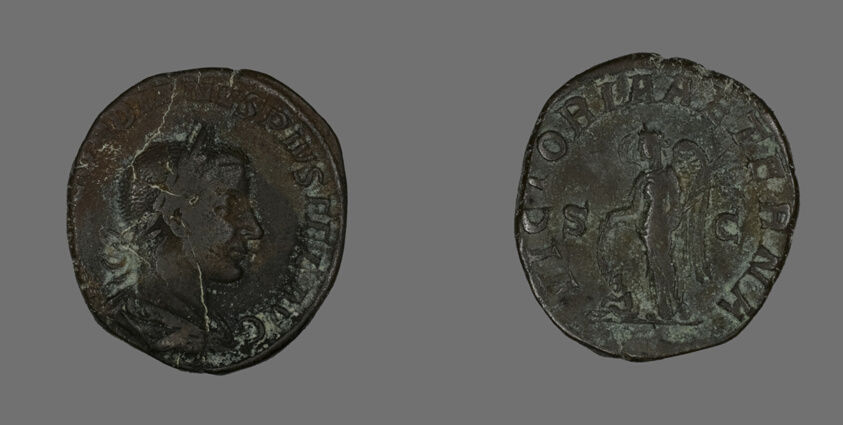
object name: Coin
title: Sestertius (Coin) Portraying Emperor Gordianus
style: roman (ancient, style or period), ancient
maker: Roman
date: 238-244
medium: Bronze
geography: Roman Empire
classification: coin; ancient art